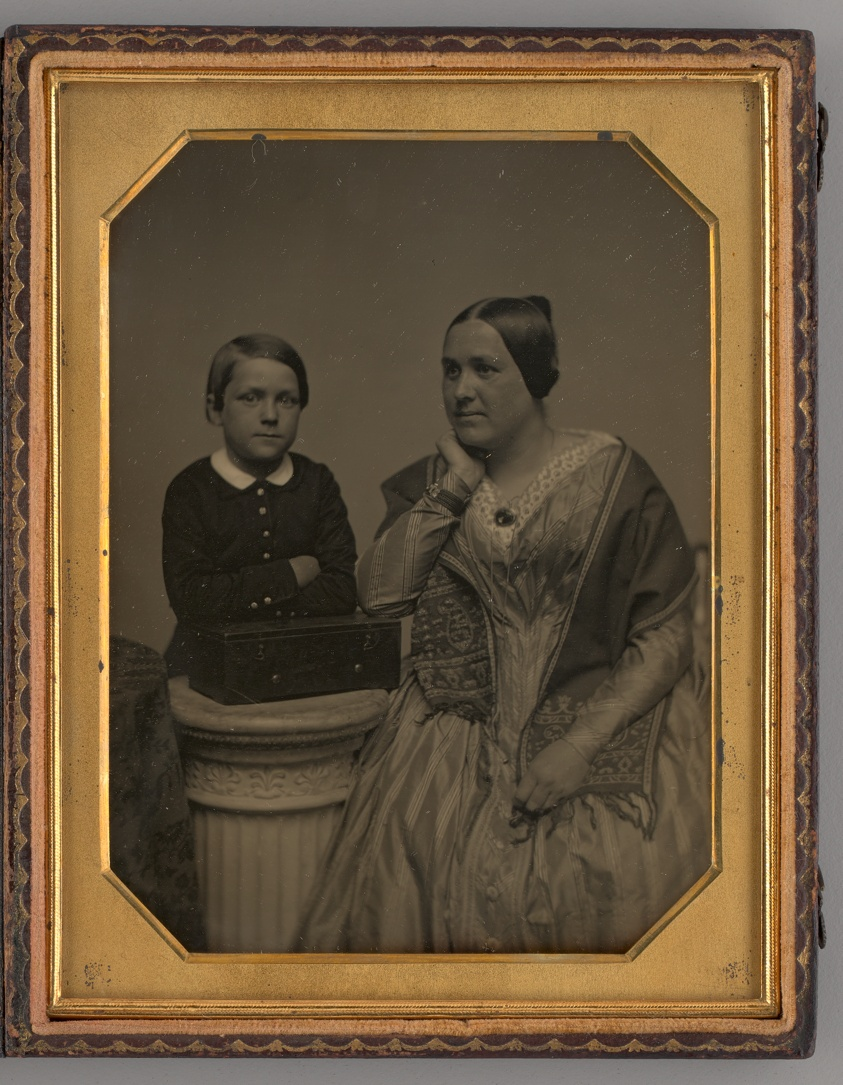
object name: Photograph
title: Untitled (Portrait of a Woman and a Boy)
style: 19th century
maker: Unknown maker; American, 19th century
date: 1855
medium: Daguerreotype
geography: United States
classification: portrait; photograph; photographic process; photography; portrait; daguerreotype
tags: lundberg collection, portraits, portraits: child subject, portraits: female subject, people, portrait